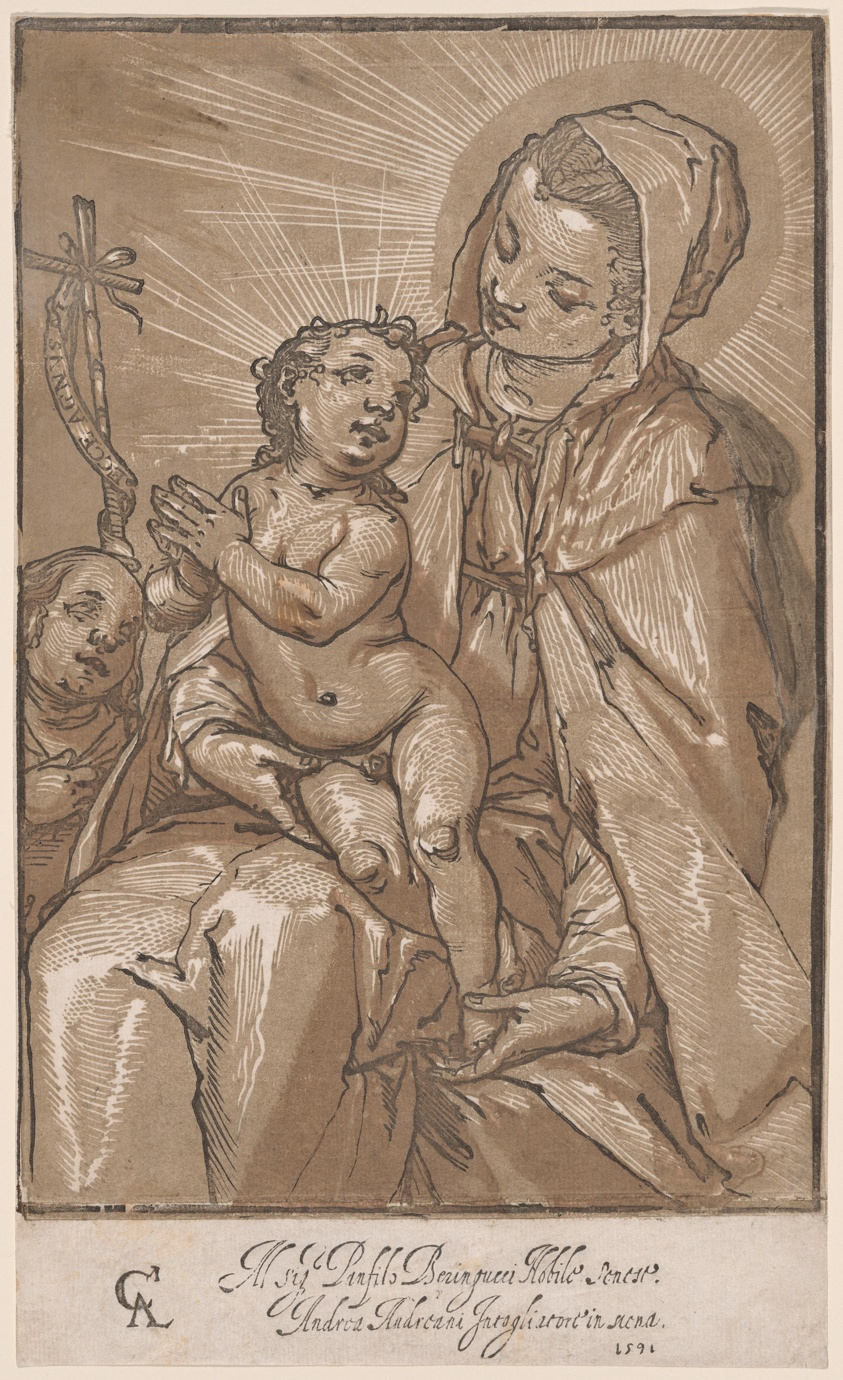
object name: Print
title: The Virgin and Child with Saint John the Baptist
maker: Andrea Andreani (Italian, c. 1558/9–1629); after Alessandro Casolani (Italian, Italian, 1552–1606)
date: 1591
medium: Chiaroscuro woodcut, in brown and black, from four blocks, with touches of brown watercolor, on cream laid paper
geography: Italy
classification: prints and drawing; paper; print; chiaroscuro woodcut